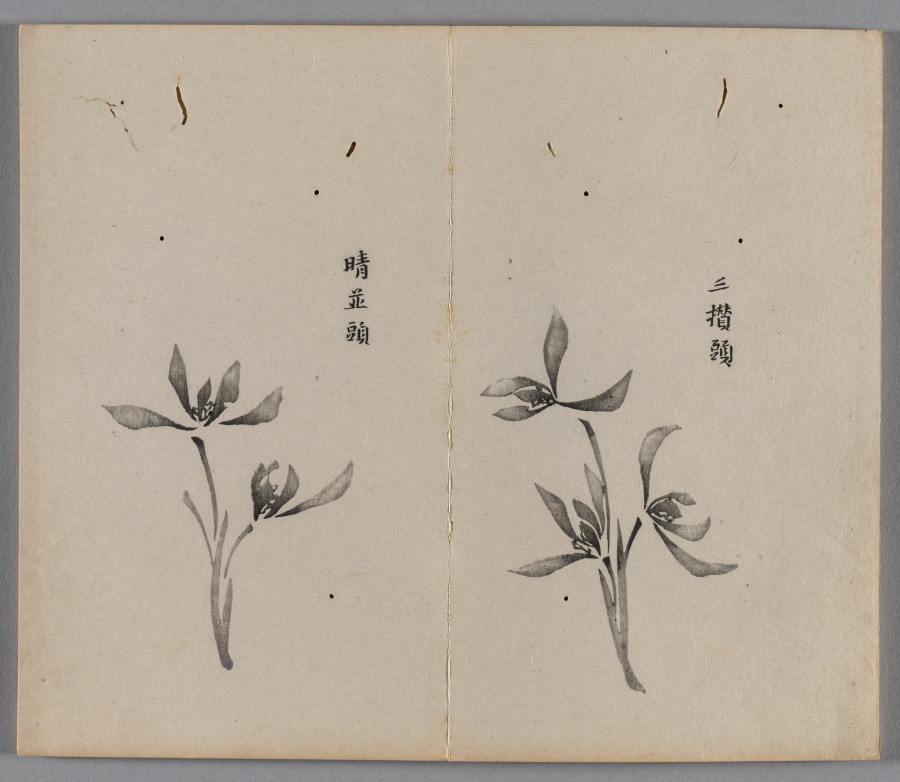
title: Ten Bamboo Studio Painting and Calligraphy Handbook (Shizhuzhai shuhua pu): Orchids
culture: China, Qing dynasty (1644-1911)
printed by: Hu Zhengyan (Chinese, c. 1584–1674)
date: 1633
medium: Woodblock-printed book; ink and colors on paper; first edition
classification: Print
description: Color printing reached a level of perfection in the early 1600s, as seen in this Ten Bamboo Studio Collection of Calligraphy and Painting and the Mustard Seed Garden Manual of Painting (printed 1679 and 1701). The painterly quality, precision in registering (aligning) the woodblocks, and harmonious colors made them the most successful color print editions in Chinese history. Both editions were printed and compiled in Nanjing, spread nationwide, and had a great impact on the arts in Japan and Korea.